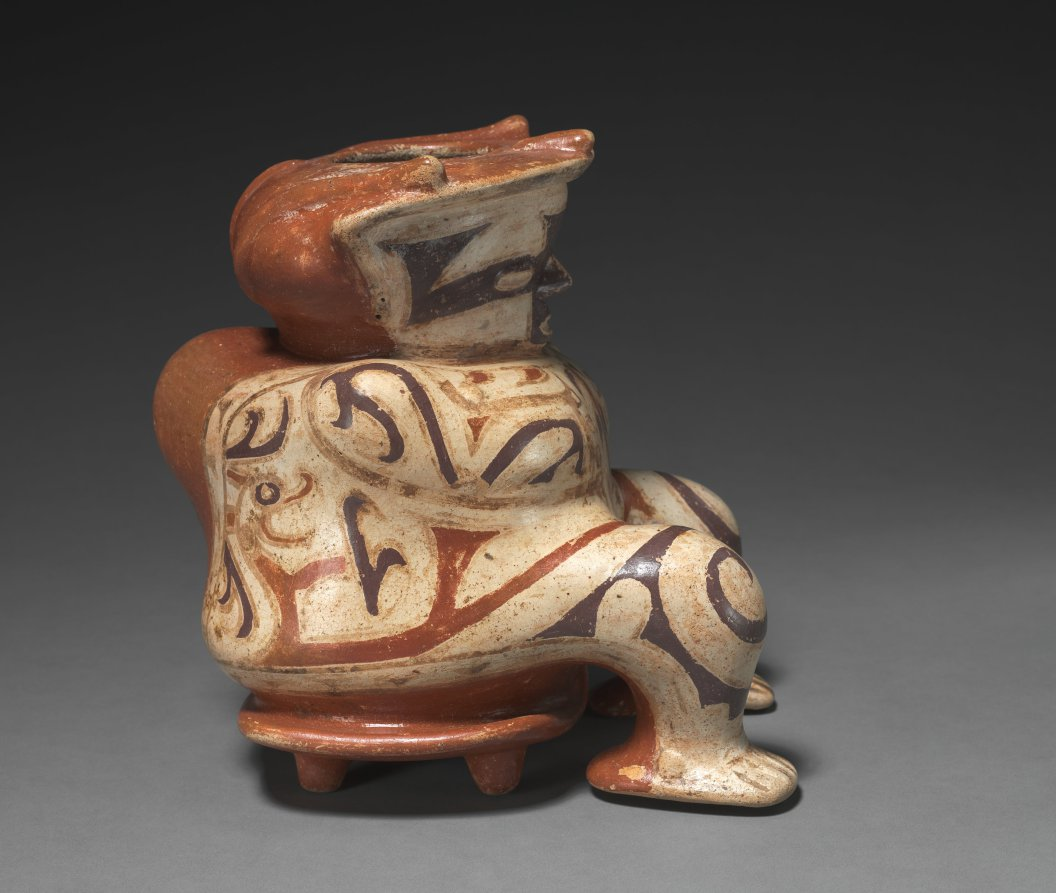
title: Hunchback Seated on a Stool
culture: Central Panama, Conte Style, c. 600-800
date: c. 600–800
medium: earthenware with colored slips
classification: Ceramic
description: The meanings of hunchbacks is not well-studied in Panamanian art. But to the north, in Mexico and Guatemala, such physical anomalies marked individuals of great spiritual power. A few of this figure’s features suggest that hunchbacks held similar status in Panama: The figure sits upon a four-legged stool, a symbol of authority, and the mythic creatures painted on each side may connect the figure to the supernatural realm.